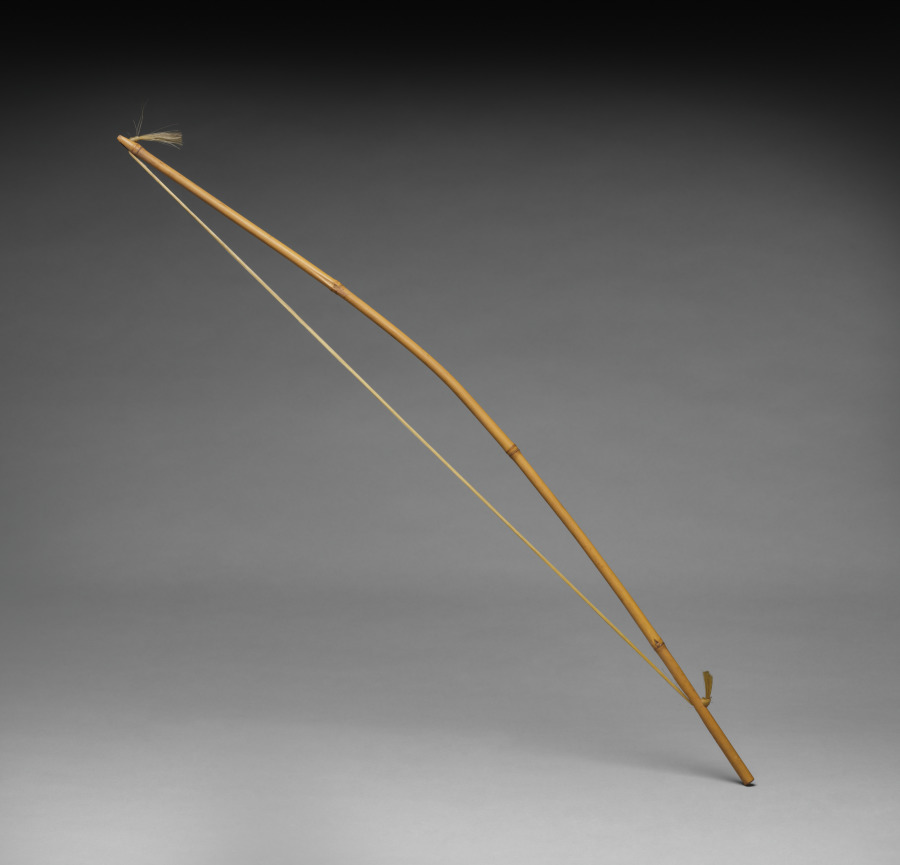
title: Bow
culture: China, Qing dynasty (1644-1911)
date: 1800s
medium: wood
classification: Musical Instrument